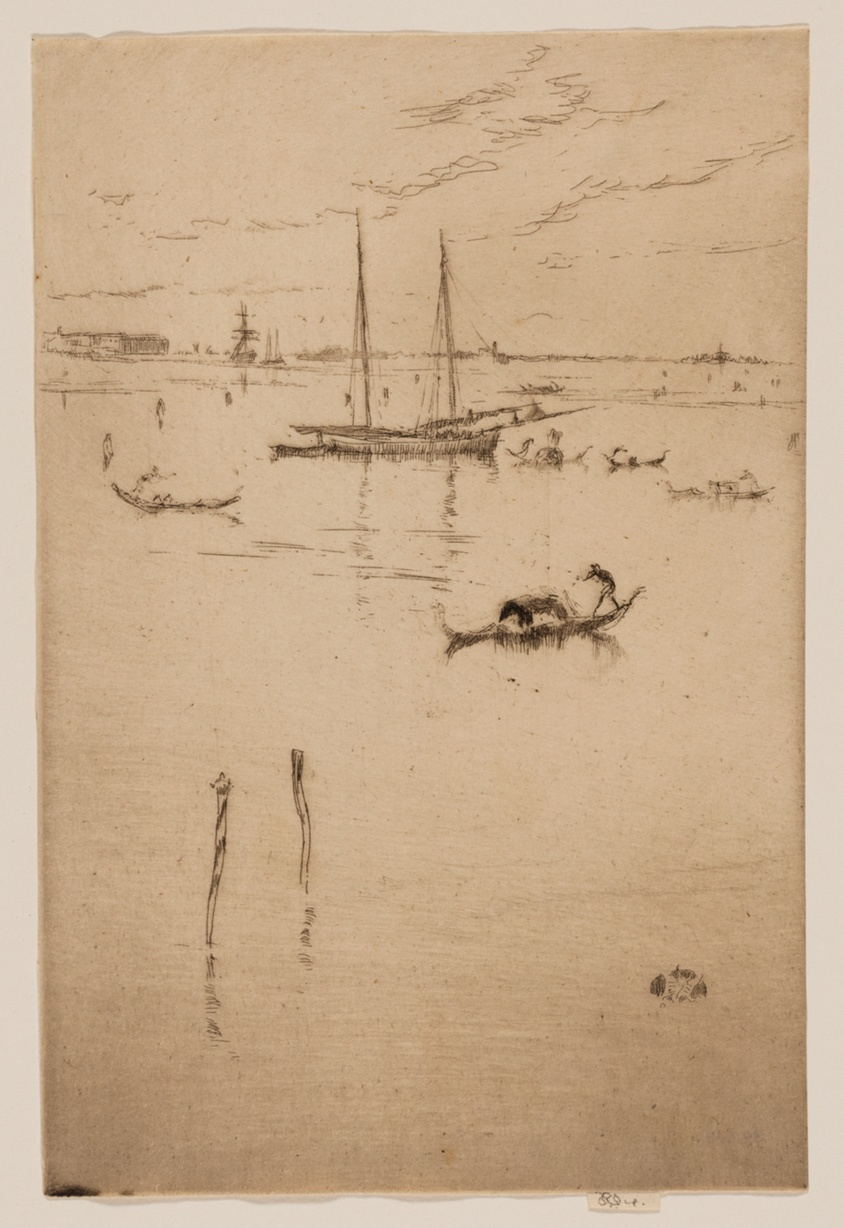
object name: Print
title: The Little Lagoon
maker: James McNeill Whistler (American, 1834-1903)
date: 1879/80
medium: Etching and drypoint with foul biting in black ink on cream laid paper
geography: United States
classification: etching; foul biting; print; prints and drawing; drypoint; paper